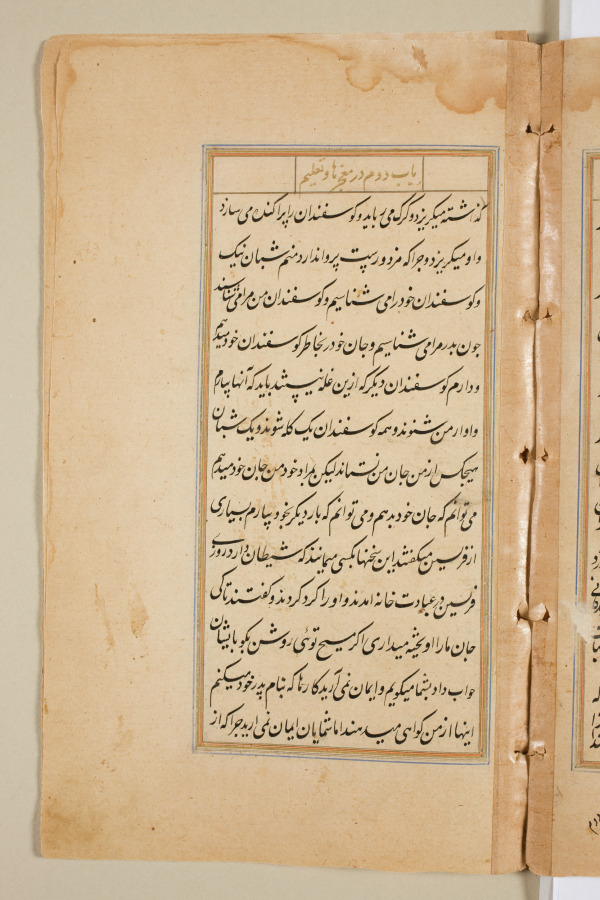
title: Text page from a Mirror of Holiness (Mir’at al-quds) of Father Jerome Xavier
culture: Mughal India, Allahabad, made for Prince Salim (1569–1627)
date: 1602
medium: Ink and gold on paper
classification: Manuscript